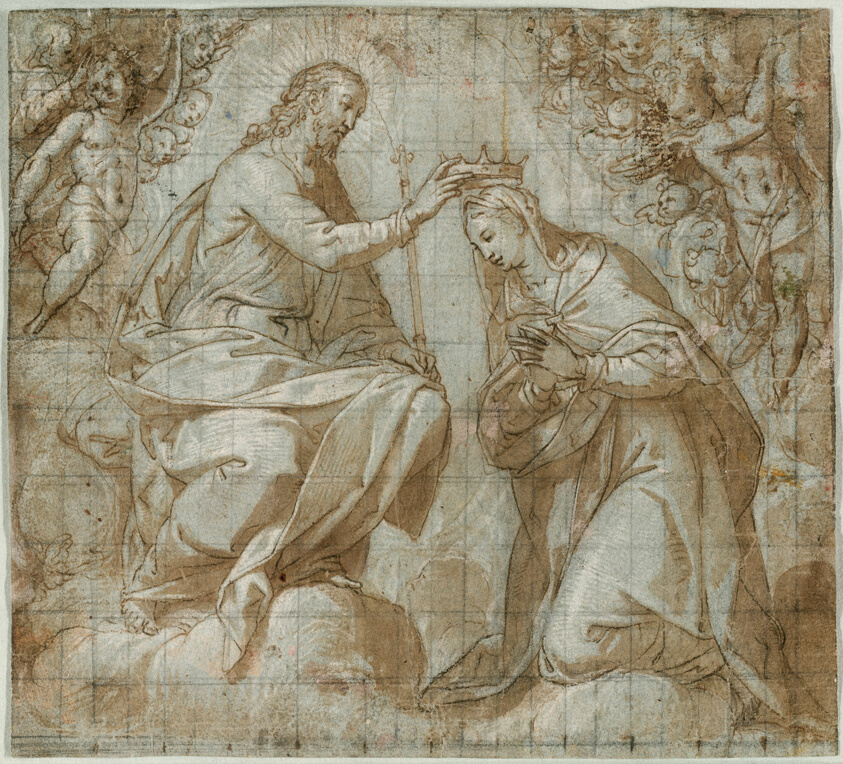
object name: Drawing and Watercolor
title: The Coronation of the Virgin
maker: Ercole Setti (Italian, 1530–1617)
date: 1575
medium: Pen and brown iron-gall ink and brush and brown wash, heightened with white gouache, over traces of graphite, on blue laid paper, squared in graphite for transfer, with extraneous traces of colored oil paints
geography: Italy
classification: prints and drawing; brush and wash; pen and ink drawings; drawings (visual works)